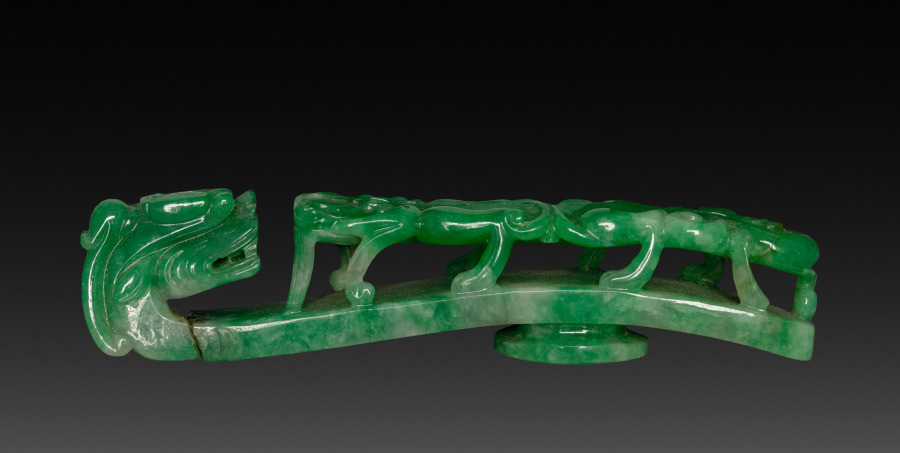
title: Belt Buckle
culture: China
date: 1800s–1900s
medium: jade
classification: Jewelry